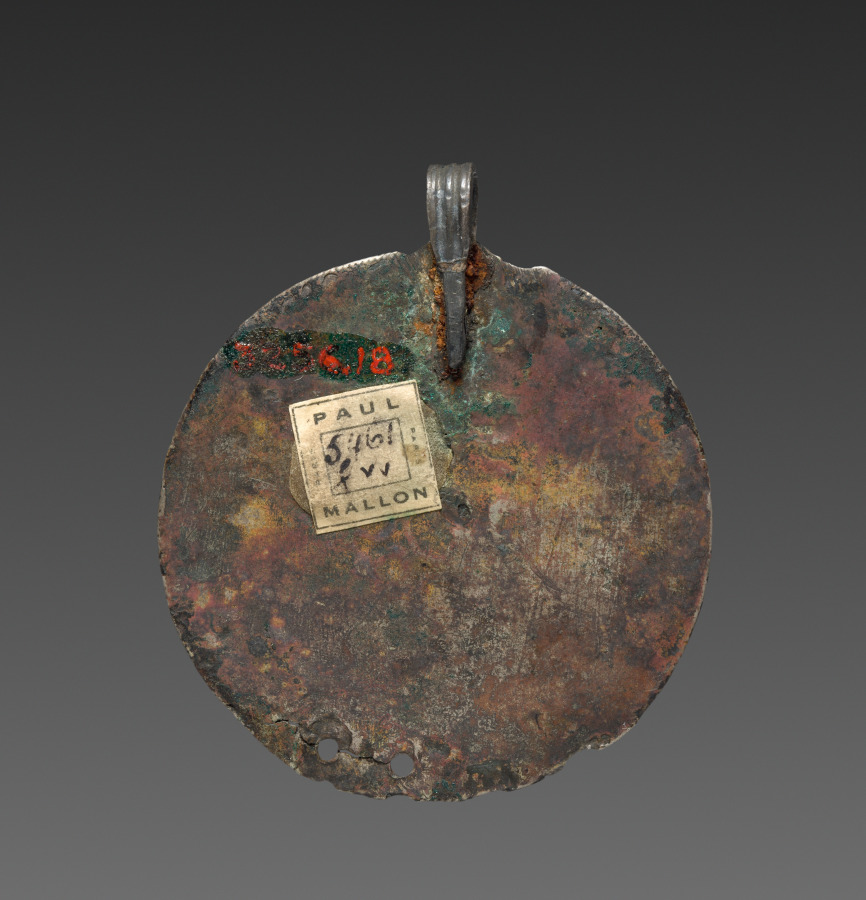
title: Disk Pendant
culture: Merovingian, Migration period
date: 300s–700s CE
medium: silver with glass inlays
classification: Jewelry